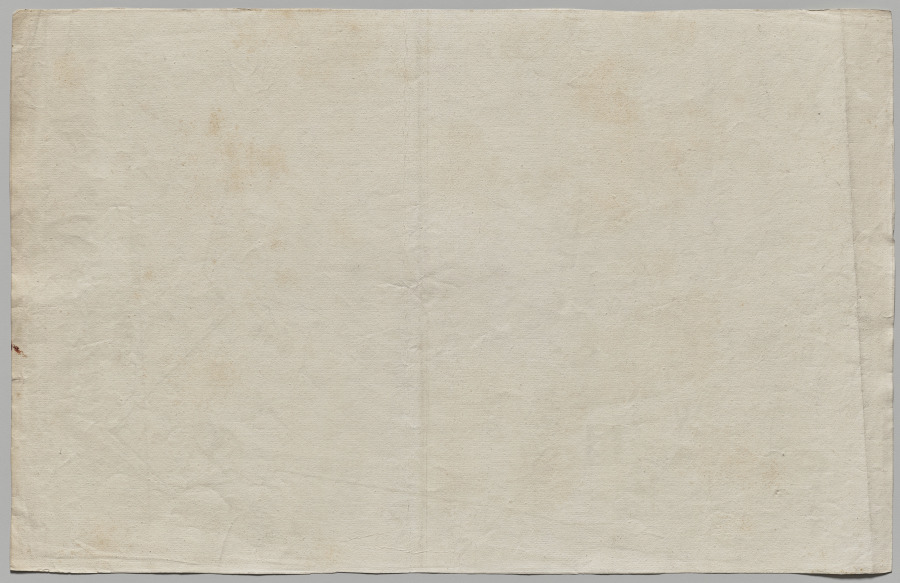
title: Nuova pianta di Roma data in luce da Giambattista Nolli l’anno MDCCXLVII, known as La Pianta Grande di Roma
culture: Italy, 18th century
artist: Giovanni Battista Nolli (Italian, 1701–1756)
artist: Carlo Nolli (Italian, 1690–1790)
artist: Rocco Pozzi (Italian, 1701–1774)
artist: Pietro Campana de Soriano (Italian, 1725–c. 1779)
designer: Stefano Pozzi (Italian, 1699–1768)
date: 1748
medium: etching and engraving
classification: Print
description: The monumental Pianta Grande di Roma, or Large Plan of Rome, which measures about 5 x 7 feet when its twelve plates are assembled, is a landmark in both cartography and printmaking. The map is considered the first scientific rendering of Rome, establishing new standards of accuracy and thoroughness when it was published in 1748. Devised by the Lombard architect and surveyor Giovanni Battista Nolli (Italian, 1701-56), the creation of the map required over ten years of surveying the city carried out by Nolli and a team of assistants with the help of new measuring devices. In Nolli’s “ichnographic” (also called “ground”) plan, architectural features and the urban infrastructure are reduced to a single horizontal slice, a minutely detailed footprint that conveys dimensions, proportions, and orientations to scale with the utmost clarity.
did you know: To make this map, Pope Clement XII granted the mapmaker permission to measure courtyards and other interior, inaccessible spaces in monastic communities, even those in nuns’ convents, which was controversial at the time.